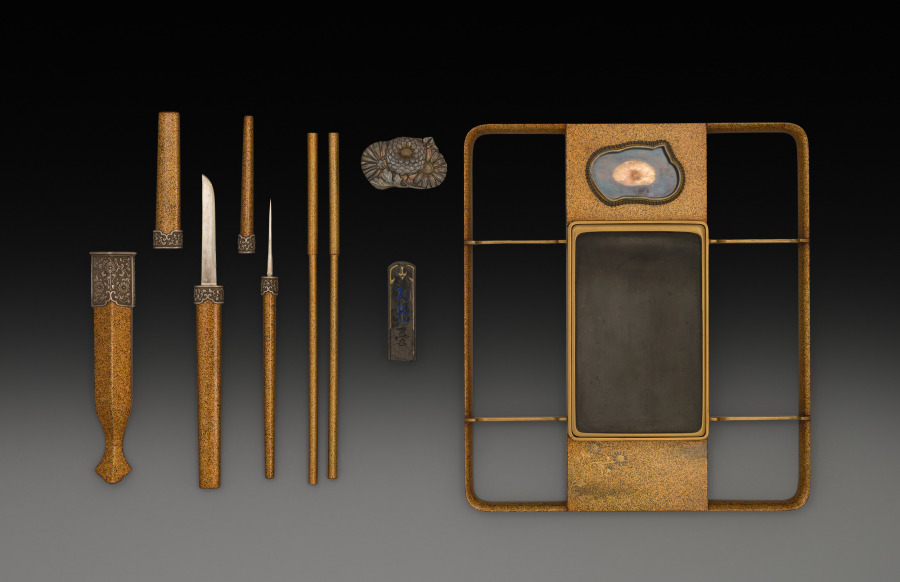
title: Base of Writing Box (Suzuribako) with Chrysanthemum and Plum Containing Inkstone, Water-dropper, Brushes, Ink-stick Holder, and Paper Knife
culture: Japan, Meiji period (1868–1912)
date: late 1800s-early 1900s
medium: Lacquer over wood with gold and silver sprinkled powder (maki-e)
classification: Lacquer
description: Both functional and elegant, this is a container for an ink stone, brushes, and ink from a set of writing tools that included a larger box for paper. Against a sleek gold lacquered ground, its artist has used restraint in sprinkled powder decoration (maki-e) to produce the design of cockscomb and harvested rice on the interior of the lid.